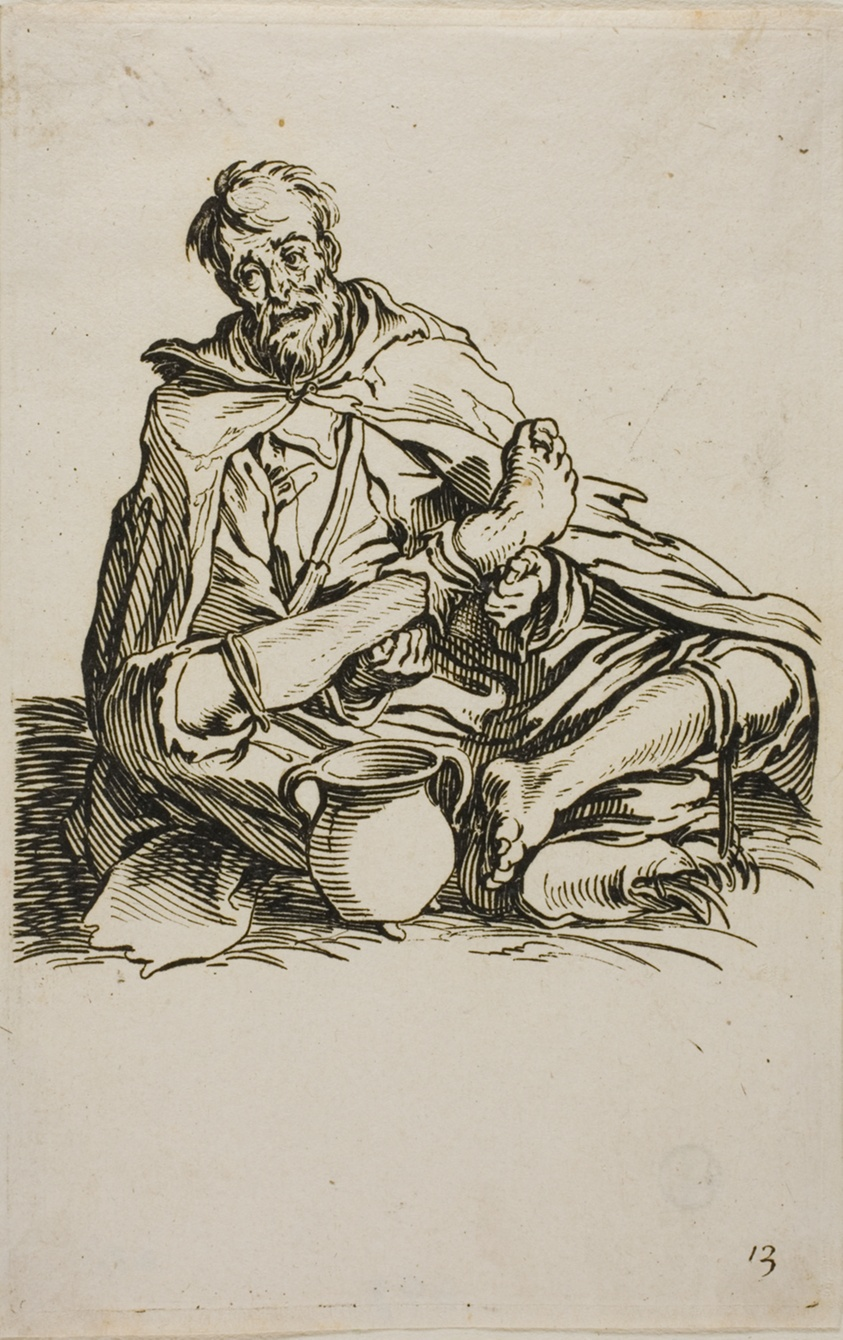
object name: Print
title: The Sickly One, plate thirteen from The Beggars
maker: Jacques Callot (French, 1592-1635)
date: c. 1622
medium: Etching on paper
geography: France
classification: etching; print; prints and drawing